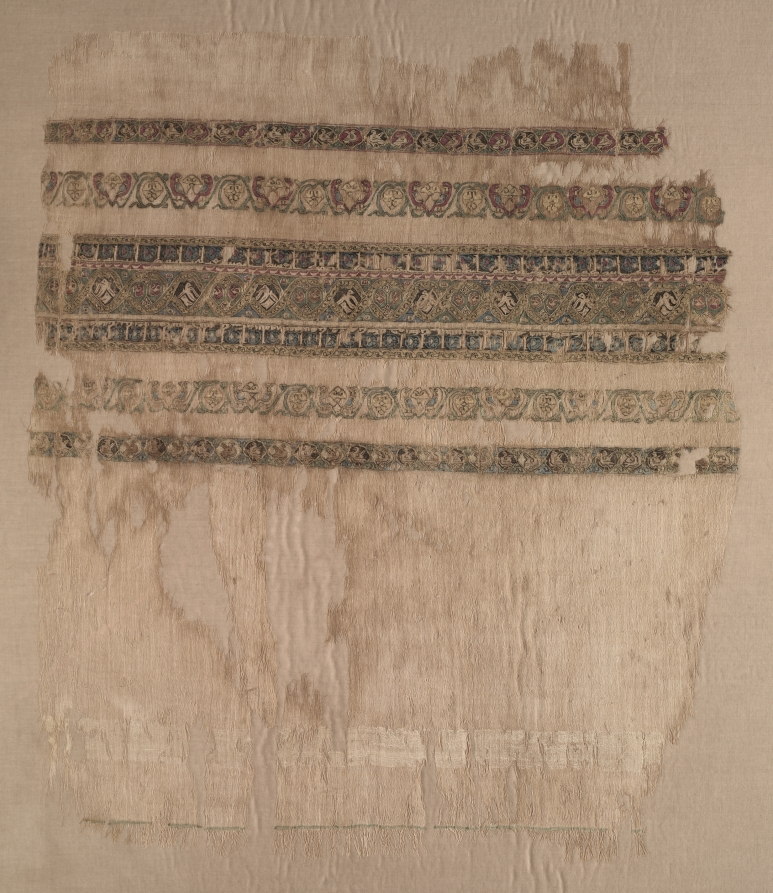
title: Turban or shawl end with tiraz and gold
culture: Egypt, Fatimid period, reign of al-Musta‘lī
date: 1094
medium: plain weave with inwoven tapestry weave: linen, silk, and gold filé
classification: Textile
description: Woven with consummate skill, this very fine linen fabric enriched with silk and gold thread displays small birds amid interlacing bands flanked by Arabic inscriptions. It represents the final artistic and technical height of imperial textiles called tiraz, a Persian word meaning embroidery or decorative work. Here, tiraz refers to textiles with Arabic inscriptions; it can also identify court workshops and their production. The historical Arabic inscription, written in angular Kufic script with decorative letter bowls and palmette scrolls between shafts, reads: “proximate victory to the servant of God and his close friend Ma‘add Abū Tamīm, the imam Ahmad [Abū] al-Qāsim al-Musta‘lī bi-Allāh and his so[ns]” (upper line), and “Commander of the believers bin [a] l-Qāsim Shā[han] shah . . . the believers . . . the Muslims[?] and the believers[?]” (lower line).